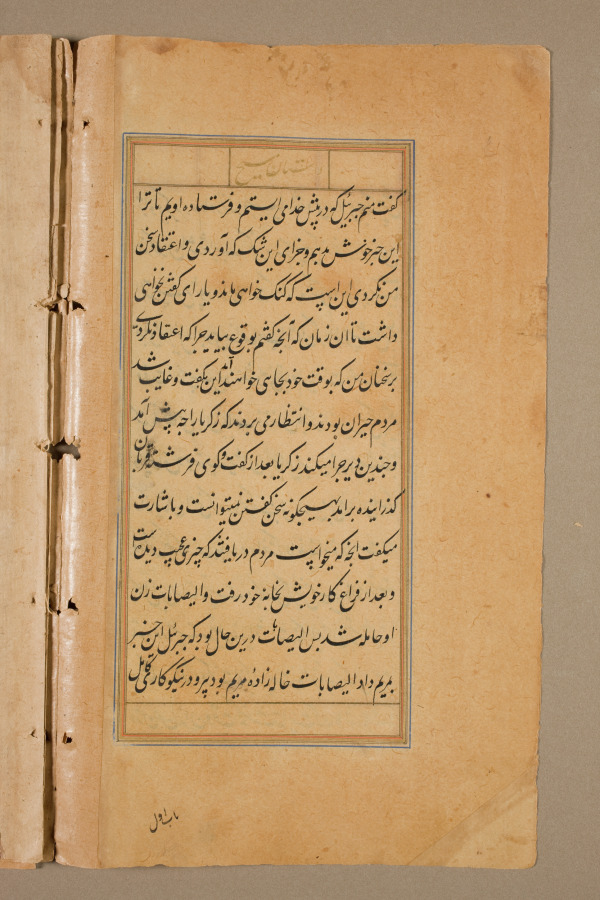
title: Text page from a Mirror of Holiness (Mir’at al-quds) of Father Jerome Xavier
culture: Mughal India, Allahabad, made for Prince Salim (1569–1627)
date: 1602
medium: Ink and gold on paper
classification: Manuscript